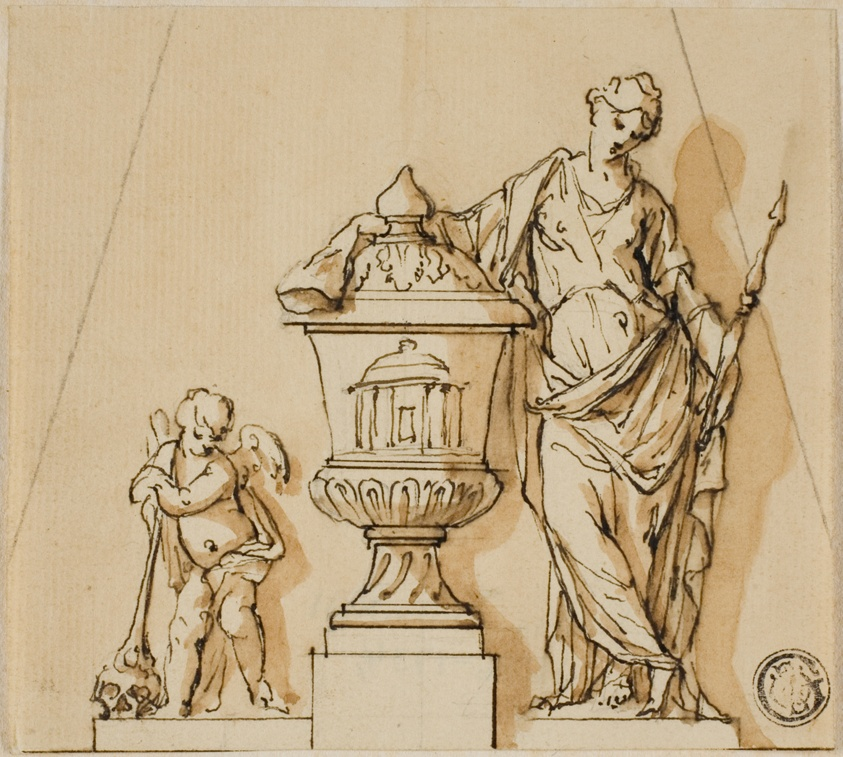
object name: Drawing and Watercolor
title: Design for a Funerary Monument with Fate, Putto, and Urn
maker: John Michael Rysbrack (Flemish, 1693-1770); or James Thornhill (English, 1675-1734)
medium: Pen and brown ink, with brush and brown wash, over graphite, on cream laid paper, tipped onto ivory laid paper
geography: Flanders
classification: pen and ink drawings; drawings (visual works); prints and drawing